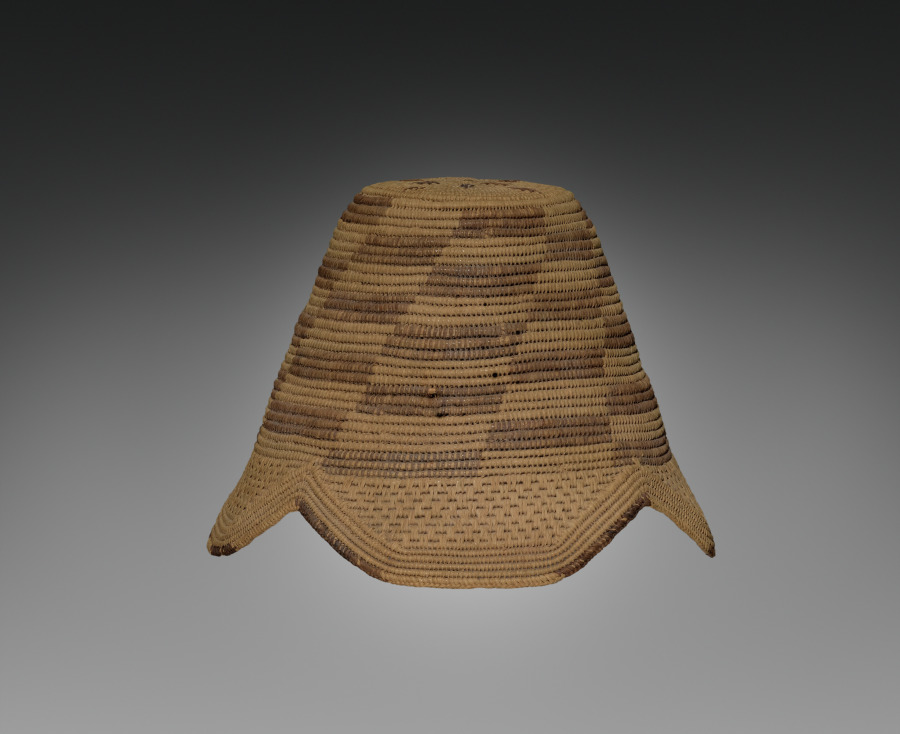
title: Hat (laket)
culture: Africa, Central Africa, Democratic Republic of the Congo, Kuba-style maker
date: early 1900s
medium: Raffia and dye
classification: Garment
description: Titled Kuba men and prominent women wear the laket, a small ornate dome-shaped hat. An essential fashion item of adult men in good social standing, it focuses special attention on the head as a significant marker of individual identity, ethnic affiliation, status, and role in society. This prestige object is secured on the crown of the head with a nine-and-a-half-inch metal pin that pierces through the hat onto a clump of hair. The laket is made from raffia palm fiber coiled into threads and woven in two alternating patterns and contrasting light and dark (dyed) wefts. There are two examples of the laket: the plain type with the flat top, and the more elaborate type called the laket mishiing.